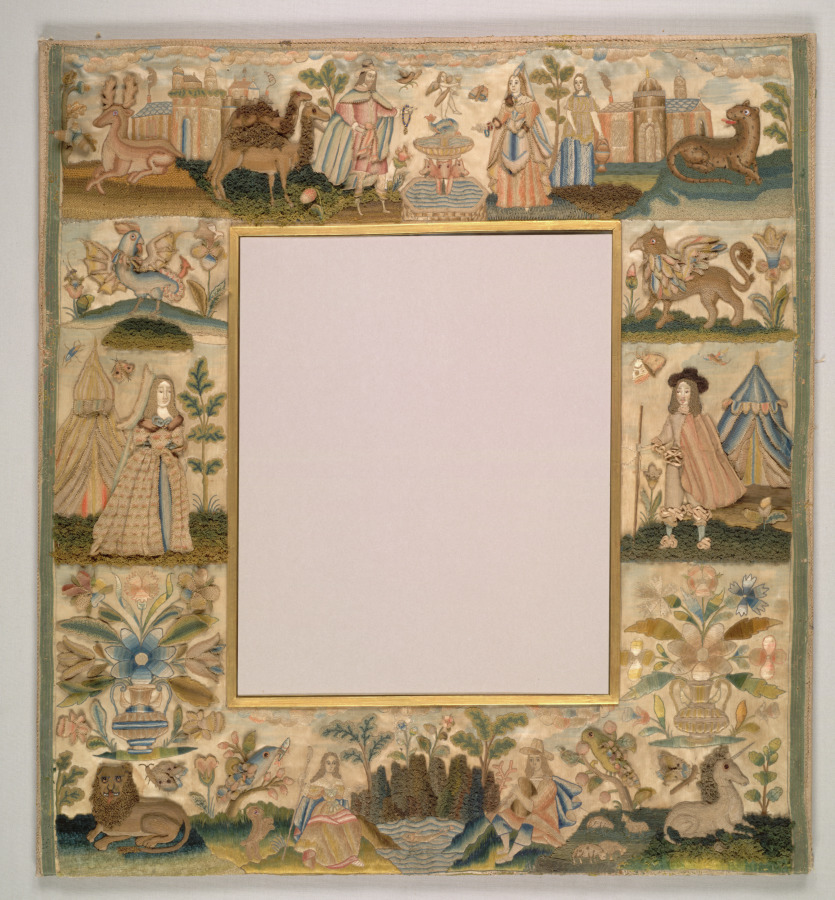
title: Mirror Frame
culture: England, 17th century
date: 1600s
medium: stumpwork embroidery on satin ground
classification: Embroidery